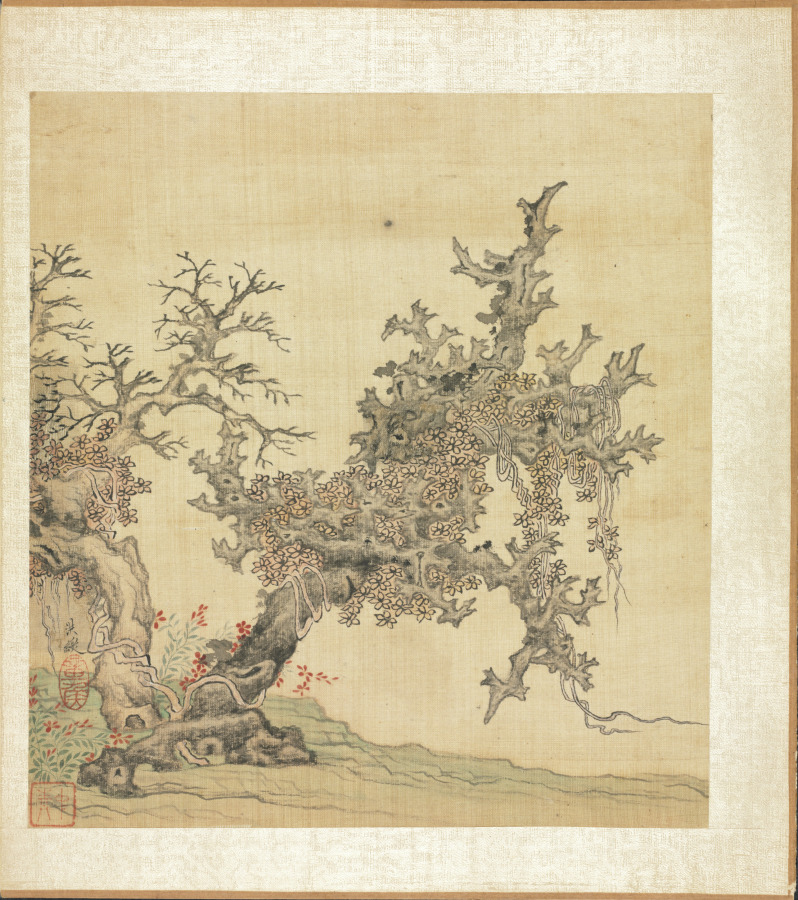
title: Paintings after Ancient Masters: An Ancient Tree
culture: China, Ming dynasty (1368–1644)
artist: Chen Hongshou (Chinese, 1598/99–1652)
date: 1598–1652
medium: album leaf, ink and color on silk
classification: Painting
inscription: Hongshou [seal] Chang-hou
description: The twenty paintings in this double-album by Chen Hongshou include landscapes, figures, and flowers. It also has one leaf featuring a woman, an often-used subject not found in the other albums from the latter part of his career. His late works are wonderful summations of Chen's peculiar and quirky art--archaistic, hyper-refined--but without accompanying shallowness or sentimentality. His figures and landscapes in the late albums are miniaturized, not unlike the small Chinese gardens, or the carefully selected small table rocks or old roots used for contemplation to see the world in miniature. This loss of scale is quite deliberate and reflects the psychological situation of a depressed class like the Ming loyalist officials and scholars, deprived of their integrity and honor, and forced to lead a diminished and restricted existence.